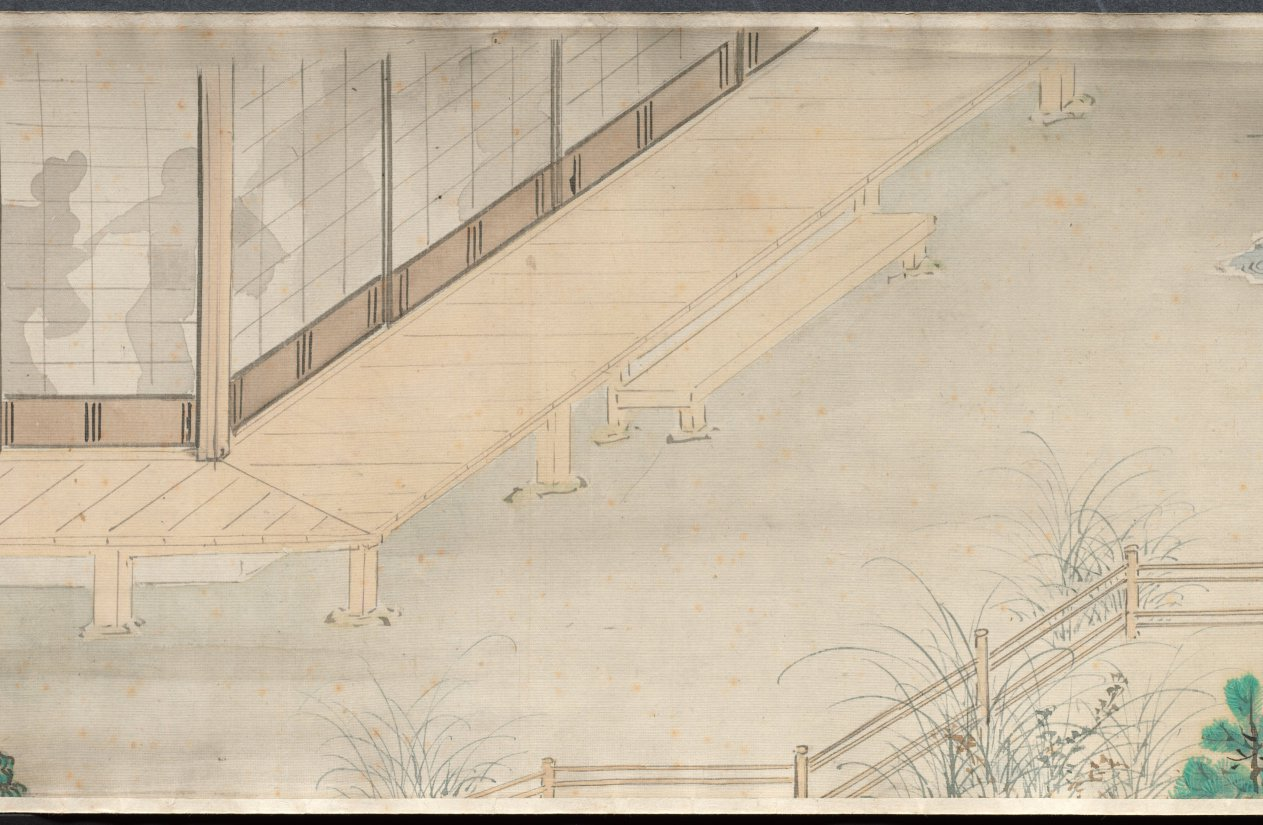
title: The Shadow Dancers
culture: Japan, Edo period (1615–1868)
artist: Yamamoto Baiitsu (Japanese, 1783–1856)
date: 1800s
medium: handscroll, ink and color on silk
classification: Painting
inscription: artist's signature and two seals at end of painting.